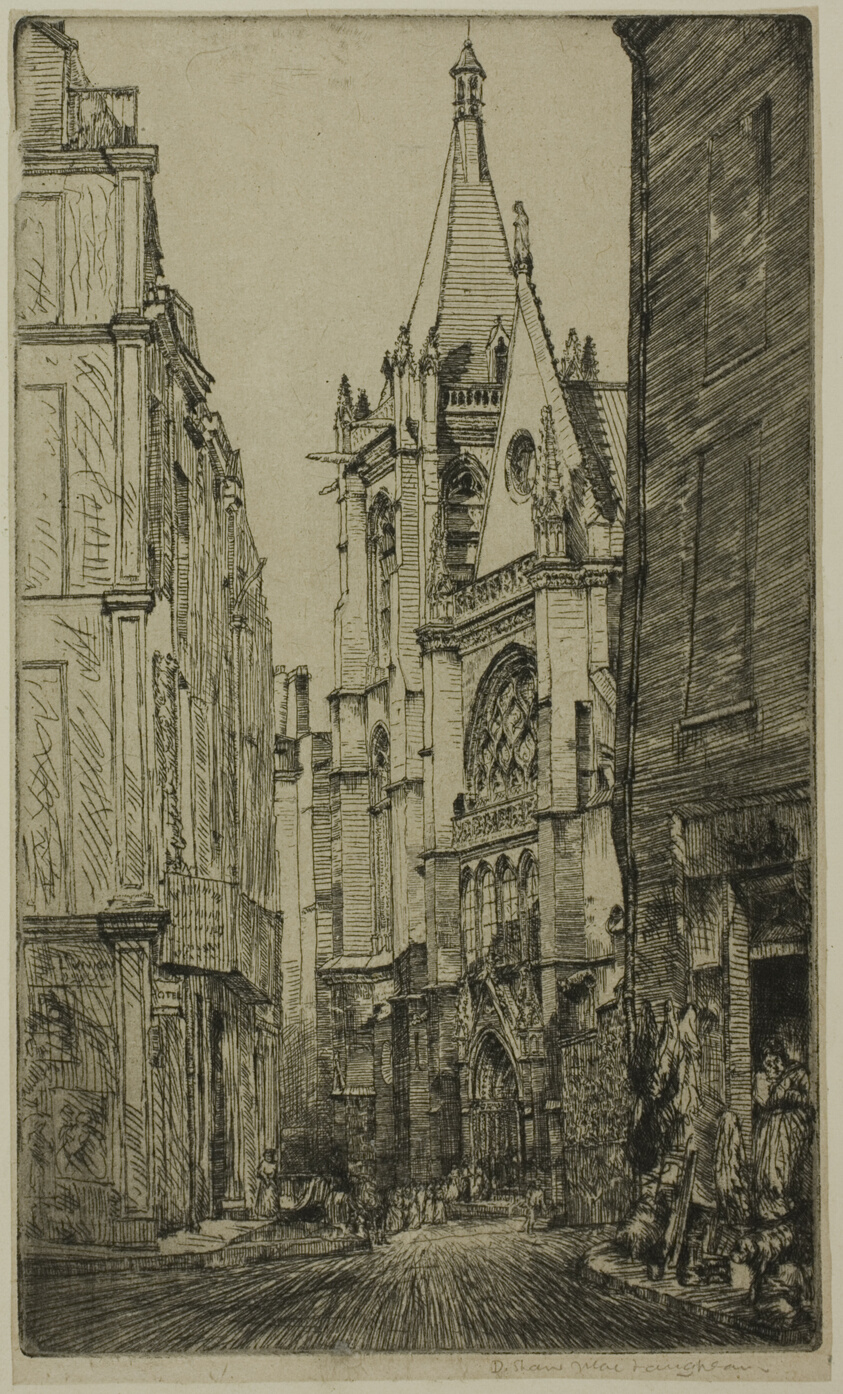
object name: Print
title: St. Severin, Paris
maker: Donald Shaw MacLaughlan (American, born Canada, 1876-1938)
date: 1902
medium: Etching in black on ivory wove paper, laid down on cream card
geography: United States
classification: etching; print; prints and drawing